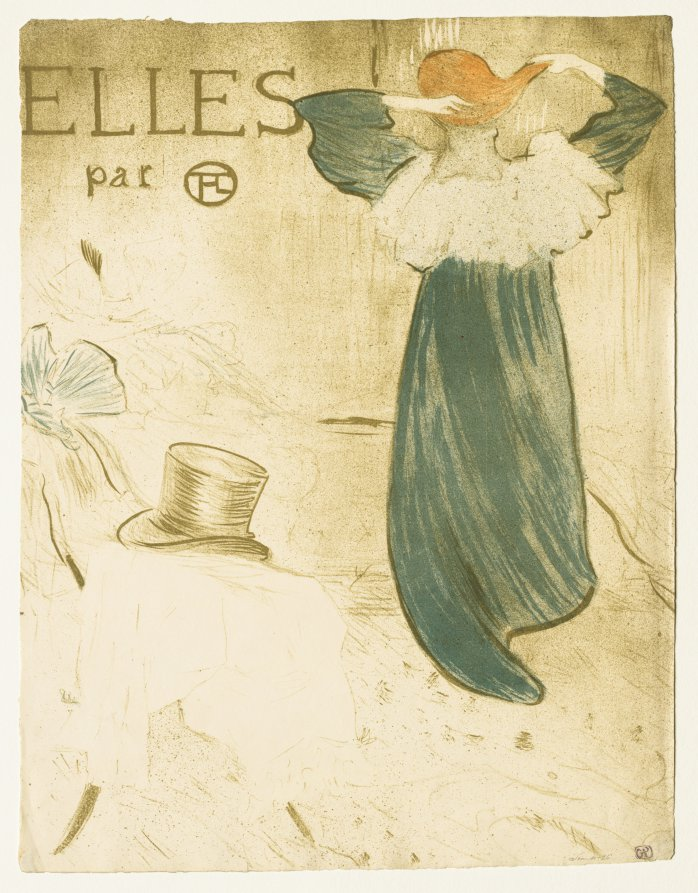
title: Elles: Frontispiece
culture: France, 19th century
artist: Henri de Toulouse-Lautrec (French, 1864–1901)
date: 1896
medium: color lithograph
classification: Print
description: The French publisher Gustave Pellet, hoping to attract new customers, persuaded Lautrec to make a series of ten prints, plus frontispiece and cover, depicting brothels. Although it was not unusual to see prostitutes pictured in the popular press, Lautrec was the first well-known, successful artist to tackle this subject. The set was a commercial failure when it first appeared, perhaps because the scenes are not erotic. Lautrec had said that "they are women to my liking", and between 1892 and 1895 he often lived in various Parisian brothels for weeks at a time. This allowed him to witness the daily lives of the women, including the intimate acts of sleeping and bathing, and to sense their suffering. The result is that only two of the scenes show prostitutes as desirable temptresses. The remainder depict the mundane routine of the women's private world, their caring for each other, their boredom, and, living on the periphery of society, their sense of isolation. Lautrec did not take a direct moral stand. He portrayed the women sympathetically, restoring to them their humanity. One scene shows Juliette Baron, whose life of vice has led to premature aging, bringing her daughter Paulette breakfast. Other images depict the women at private moments, bathing or combing their hair in natural, relaxed poses, unaware of being observed. The beauty of the drawing and use of color makes this set one of the masterpieces of late nineteenth-century French color lithography.